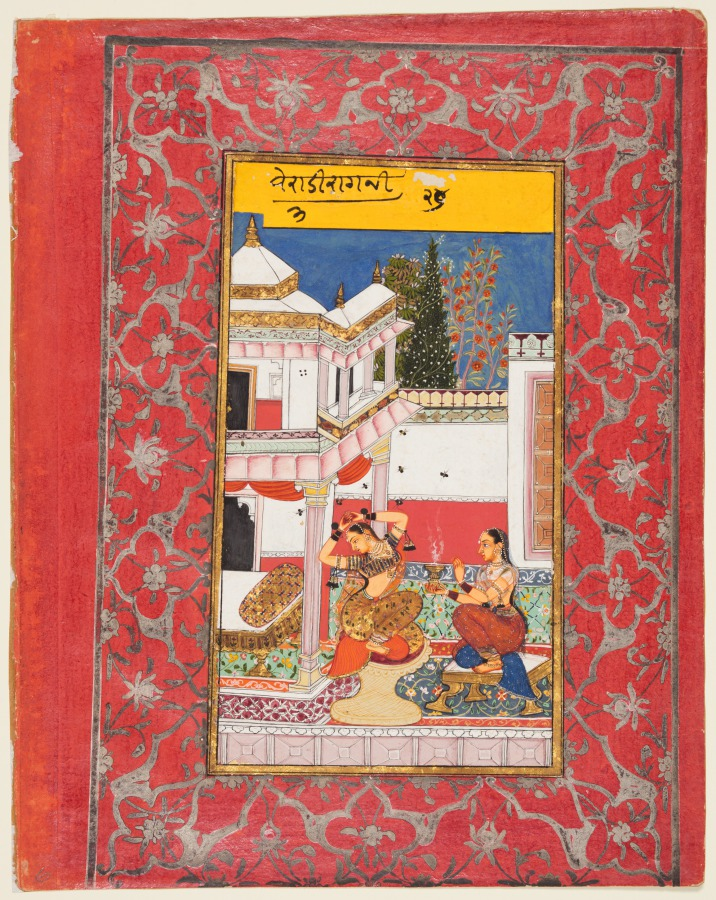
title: Woman Longing for Her Lover: Verati Ragini of Dipak, from a Ragamala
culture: Northwestern India, Rajasthan, Rajput Kingdom of Kota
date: 1650–60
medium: gum tempera, ink, gold, and silver on paper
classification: Painting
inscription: veratī rāganī. 3. 27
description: Outside an open bedchamber, a woman sits on a high stool with her arms stretched up overher head. Her attendant holds a pot of incense that will make her body and garments fragrant in anticipation of an amorous reunion. The red border with silver floral ornament is characteristic of this widely dispersed series.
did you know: A group of bumble bees surround the heroine, attracted to her perfume.